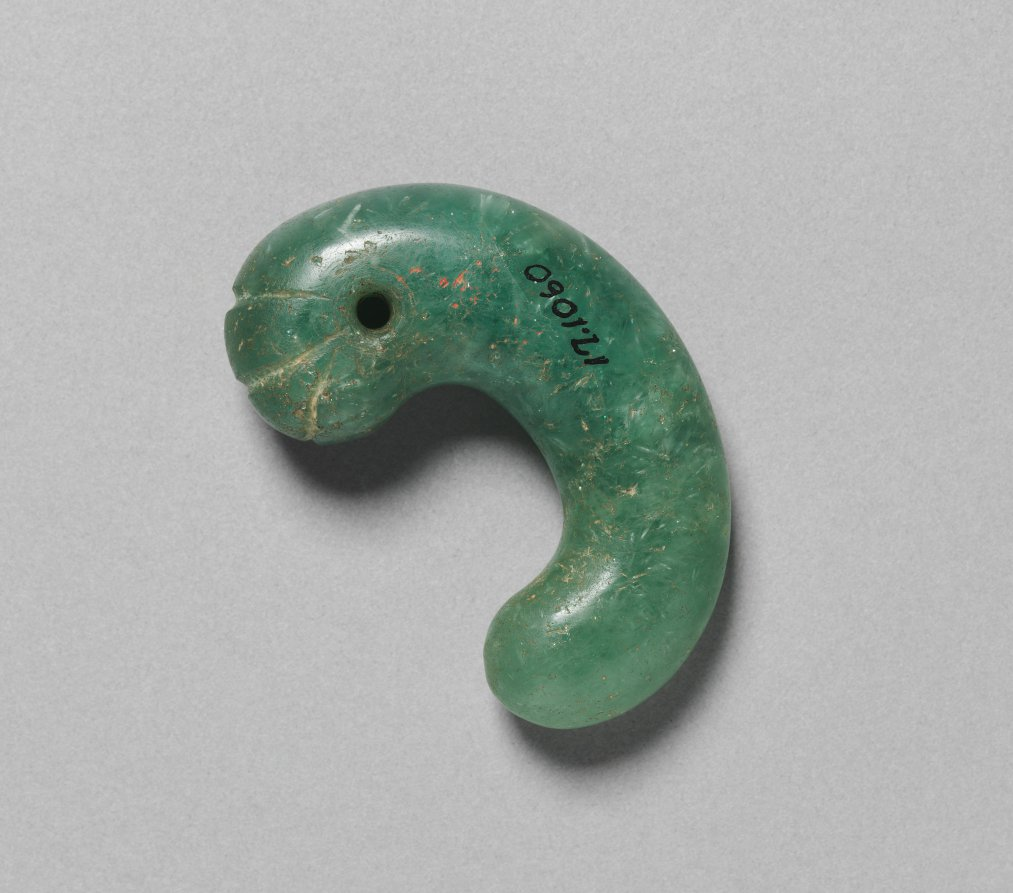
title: Comma-shaped Jade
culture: Korea, Three Kingdoms period (57 BCE–668 CE)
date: 400s CE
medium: jade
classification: Jewelry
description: Jade is one of the hardest stones and requires an intensive, arduous process of abrasion—cutting, chiseling, grinding, and polishing—to achieve the desired shape. A grindstone and a slurry of grit and water shape the jade into the desired form, and then a cloth dampened and rubbed with finer grit may have been used to give the jade the smooth surface. For the Silla kingdom (57 BC–985), in particular, comma-shaped jades served as an essential item for the burials of the ruling class and were luxurious accessories to decorate golden crowns. Their comma shape is thought to represent embryonic forms, symbolizing life, particularly rebirth in the afterlife.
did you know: This unique shaped jade was used as a pendant to decorate necklaces, eyerings, and crowns during the Three Kingdoms period.